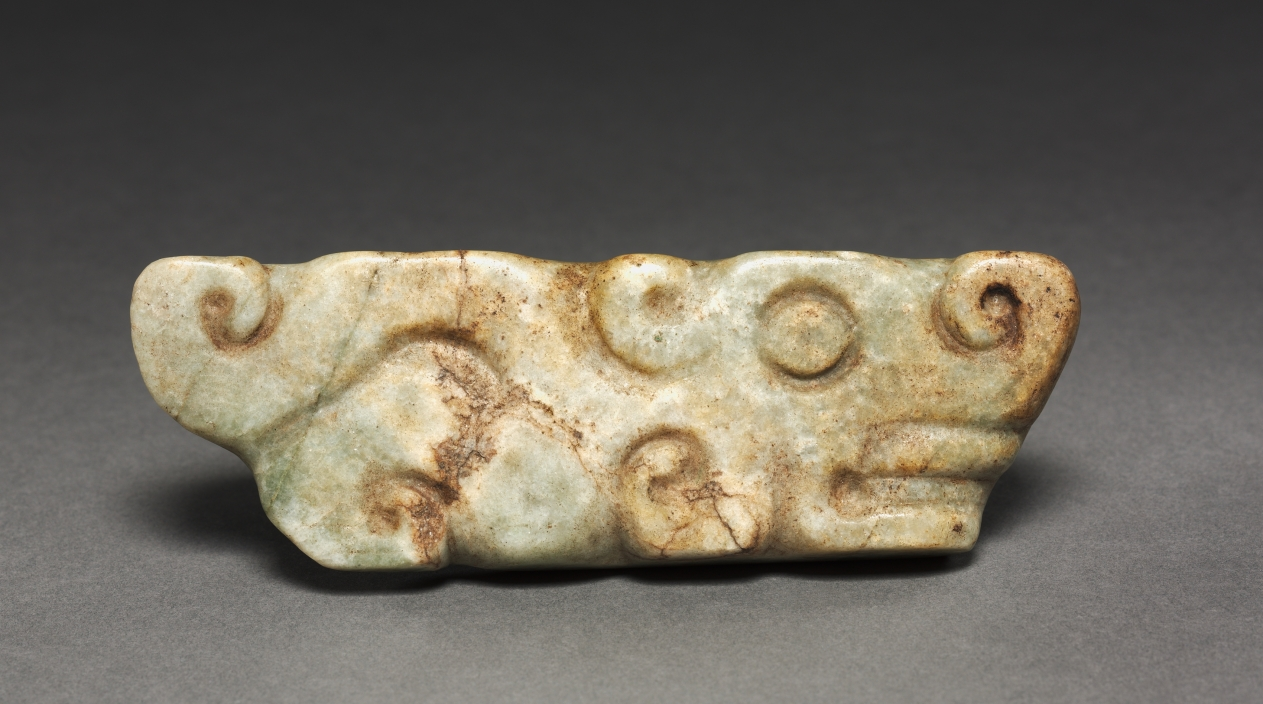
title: Jaguar Pendant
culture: Maya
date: 250–900 CE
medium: jade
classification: Jade